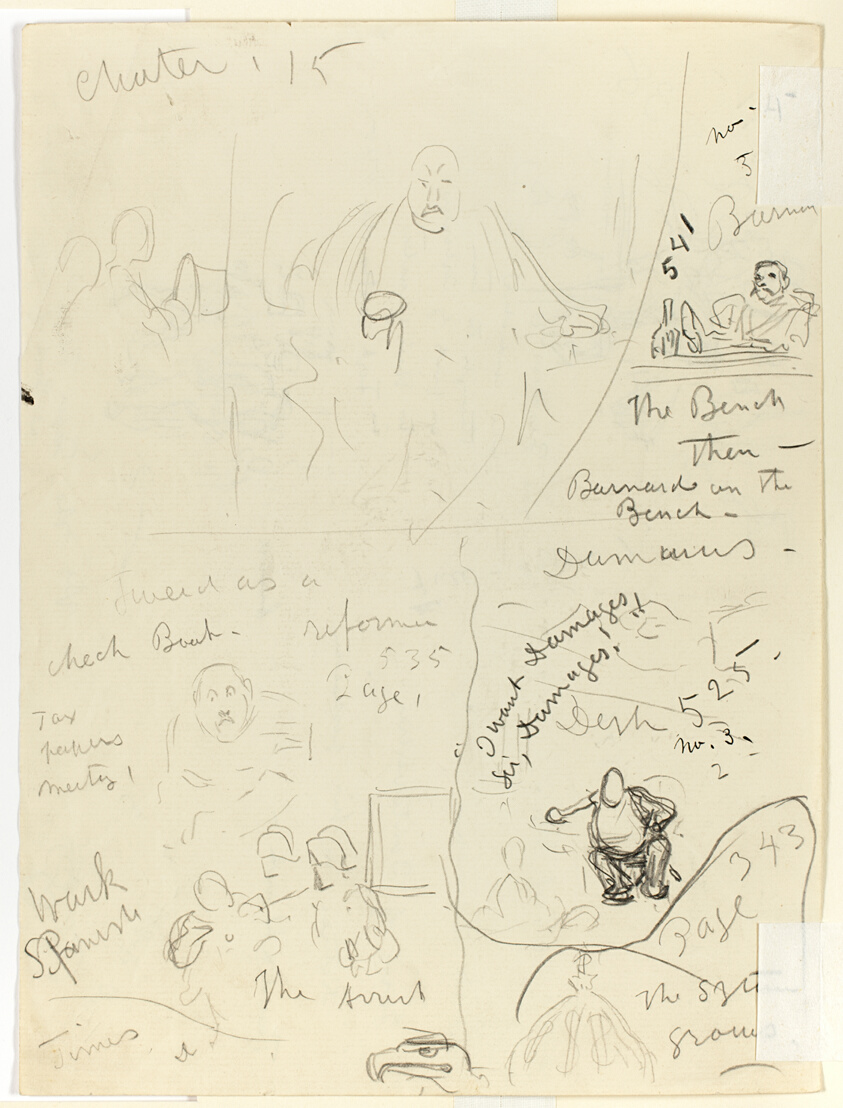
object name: Drawing and Watercolor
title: Sheet of Sketches: Soldier on Horseback and Soldier with Sabre Conduting Prisoner (recto); Sheet of Sketches (verso)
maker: Thomas Nast (American, 1840-1902)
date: 1876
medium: Pen and black ink (recto) and graphite (verso) on ivory laid paper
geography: United States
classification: pen and ink drawings; drawings (visual works); prints and drawing; graphite; paper